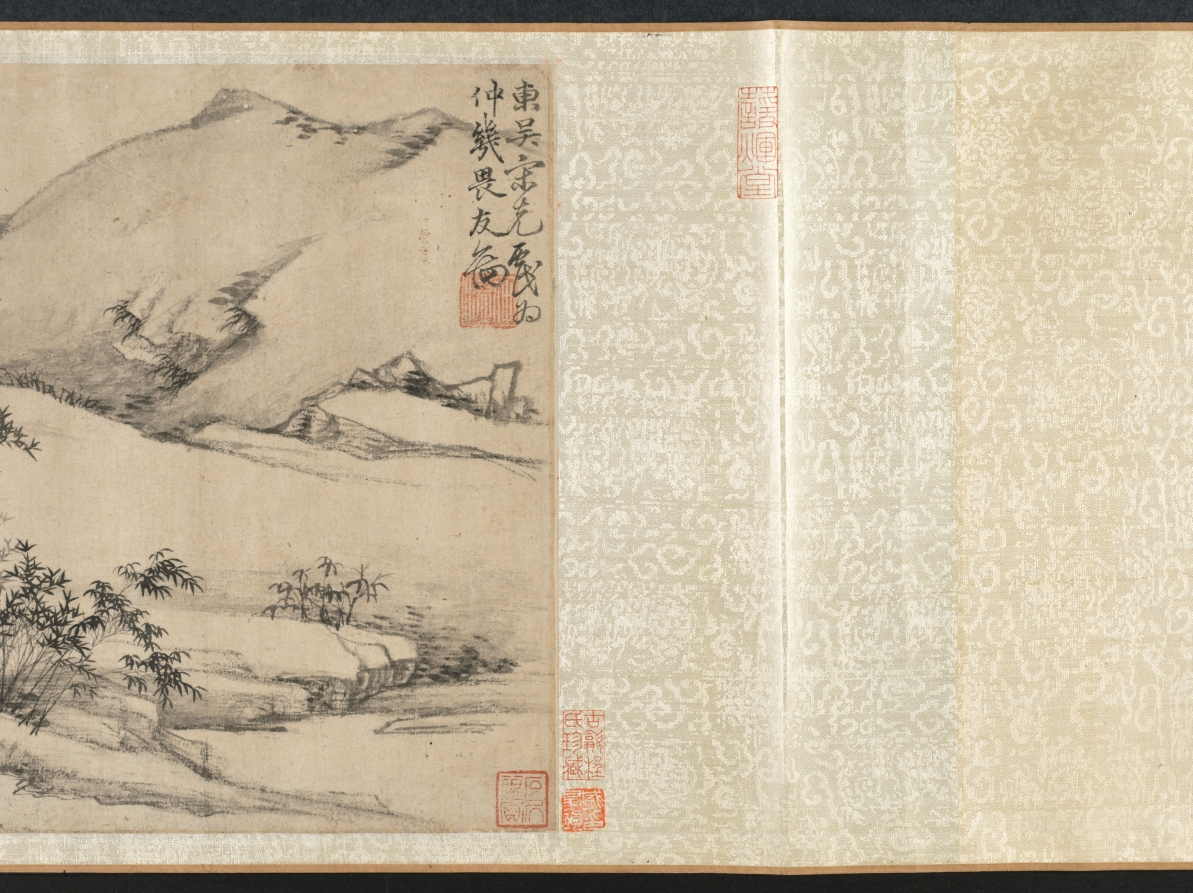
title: Landscape with Bamboo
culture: China, Yuan dynasty (1271-1368)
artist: Song Ke (Chinese, 1327–1387)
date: 1300s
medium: Handscroll; ink on paper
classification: Painting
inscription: 東吳宋克戲為仲幾畏友圖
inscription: 2 colophons and 14 additional seals: 1 seal of Yü Chung-chi (14th c.); 1 seal of Wu Ch'eng (1469 jinshi); 1 colophon and 2 seals of Wu K'uan (1435–1504); 1 colophon and 9 seals of Cheng Qi (1911–1988); 1 seal unidentified.